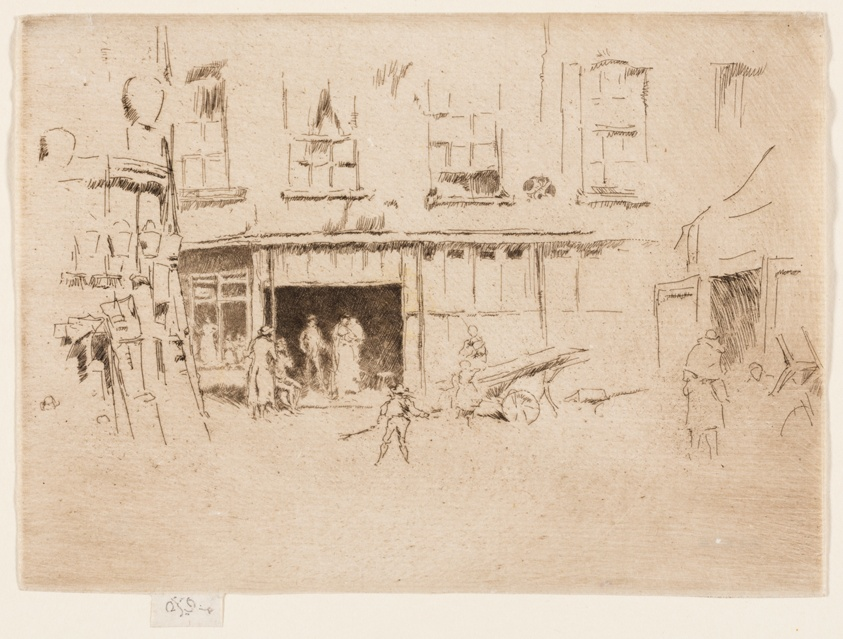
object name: Print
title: Little Court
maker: James McNeill Whistler (American, 1834-1903)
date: 1880/81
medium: Etching with foul biting in black ink on ivory laid paper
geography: United States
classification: etching; foul biting; print; prints and drawing; paper